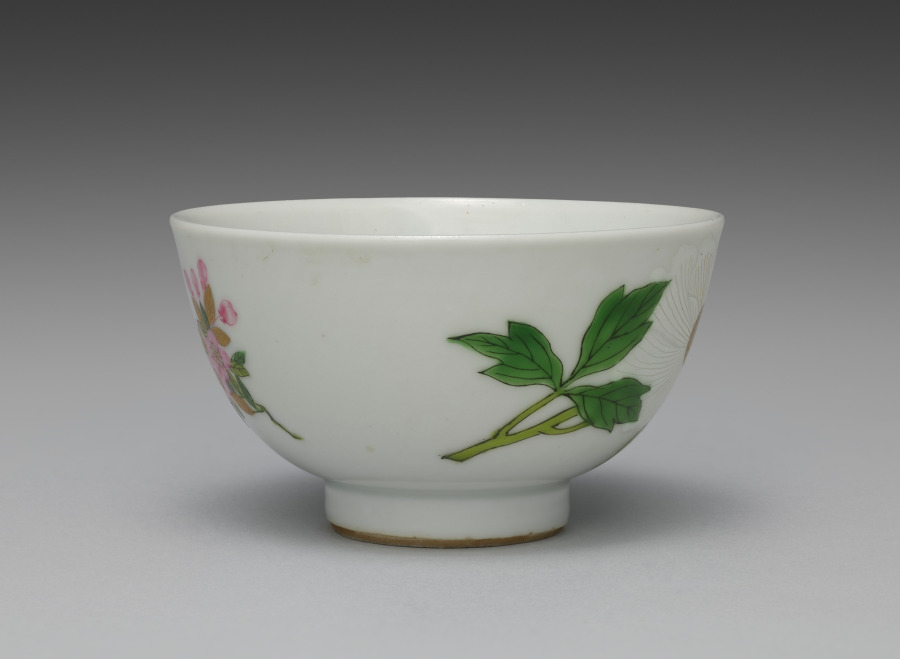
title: Teabowl from Teabowls with Peony and Crabapple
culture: Japan, Meiji period (1868–1912)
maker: Seifū Yohei III (Japanese, 1851–1914)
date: 1893–1914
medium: One from a set of five teabowls; porcelain with underglaze and overglaze color enamels and gold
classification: Ceramic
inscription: 清風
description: Overglaze color enamels are generally called iro-e (literally “color picture”) in the terminology customarily used for porcelain decoration of the Edo period. This set of teabowls is a fine example of Yohei III’s skilled use of the technique, which is identified on this set’s box lid with the alternate phrasing “porcelain with color painting” (jisaiga). Distinct from the way overglaze colors were used in Kakiemon ware from Arita, his designs and applications show a consciousness of porcelain decoration of the Qing dynasty. Here, he combines Chinese models with a sensibility taken from Kyoto ware precedents, including painting with powdered gold (kinrande). The colors used in the bowls are as follows: blue, black, gold, white, light green, green, and pink. The blue appears only inside the footring, as a double band of underglaze color. The black iron, used for stems and leaf veins, is painted over the glaze. The gold, also painted over the glaze, is used for leaves and the centers of flowers, for solid, glossy lines defining detail, or as a semimatte ground. The white of the peony flower is built up to a low relief over the glaze. Yohei has incised lines of varying widths into the pigment, carving away to the bowl’s surface, to differentiate individual petals and their rippled shapes. The light and dark greens, as well as the pink, are painted over the glaze. Of note is how Yohei has first used thinly applied lines of light green to draw the plum branch before applying the opaque iron black. For the plum buds and flowers, he has used a diluted pink with an opaque pink for outline, both over the glaze. In his later works, Yohei used pink both over and under the glaze in a manner similar to underglaze blue, and it can be challenging in some cases to discern which technique he has used. A lidded container in a private collection has a similar design but is augmented with the inclusion of white and purple magnolia blossoms. In contemplating the original decorative program of a set, of which these teabowls may have been a part, it is worth considering that perhaps not all objects included the full range of motifs. In such cases, the composition of the individual object may be best understood within the context of the extended ensemble. Here, the delicate pink plum on one side of the bowl seems slightly unbalanced with the bold white peony on the other, but when seen with other objects with the magnolia and its additional colors and shapes, it is possible to imagine a set with a complex, balanced design across multiple pieces.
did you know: "Seifū" is inscribed on the base in a double band of underglaze color.